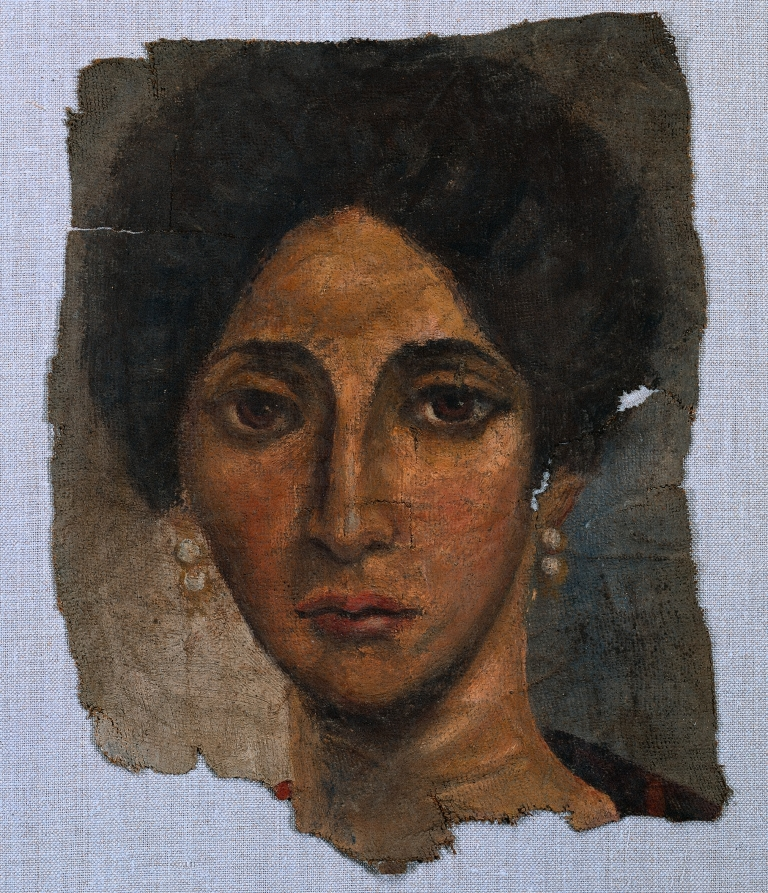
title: Funerary Portrait of a Woman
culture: Egypt, Roman Empire, Antonine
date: c. 138–92 CE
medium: encaustic on linen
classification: Painting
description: So-called mummy portraits were apparently painted during the owners' lives and hung in their homes. At the time of the owner's death, the portrait was taken down, cut from its frame, and trimmed to fit the deceased's mummy, to which it was bound. It was at that time also that the gilding on the center painting was added.